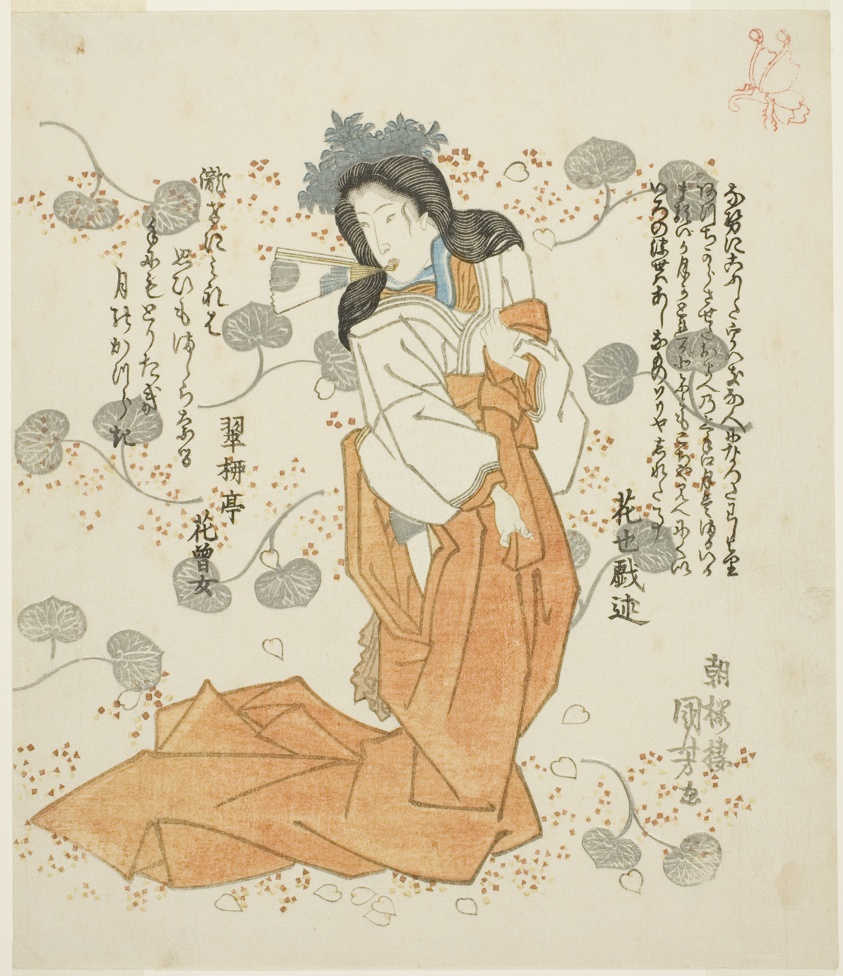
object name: Print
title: Women holding fan in her mouth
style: Japanese (culture or style)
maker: Utagawa Kuniyoshi (Japanese, 1787-1861)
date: c. early 1830s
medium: Color woodblock print; right sheet of shikishiban triptych, surimono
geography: Japan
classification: woodblock print; print; asian art